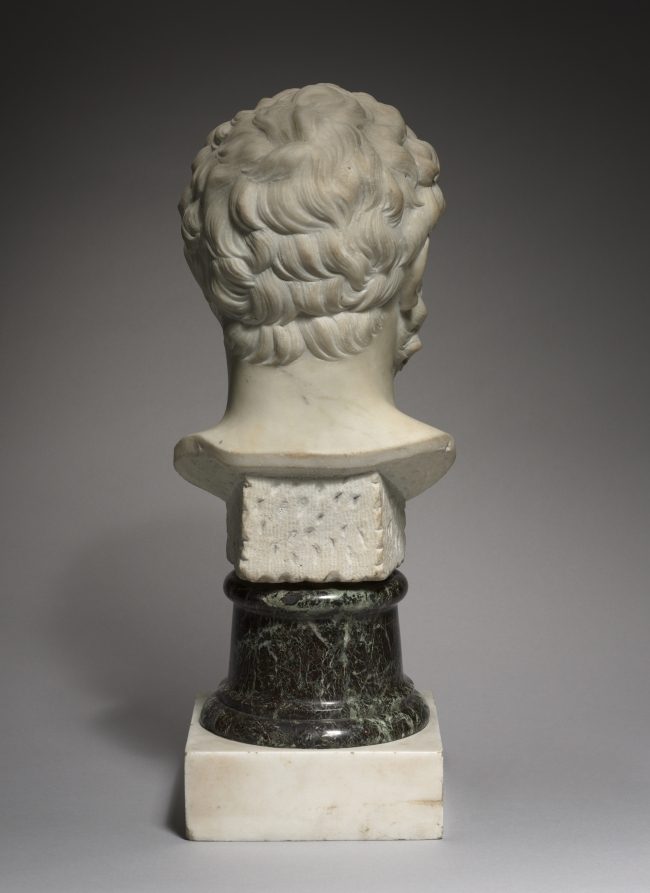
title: A Philosopher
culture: France, made in Rome, 17th century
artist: Pierre Puget (French, 1620–1694)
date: 1662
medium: marble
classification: Sculpture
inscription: inscribed: "P. Puget S. Romae / 1662."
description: Puget traveled to Rome in the early 1660s, where he closely studied ancient busts in the collections of wealthy nobles. Although inspired by Greek and Roman depictions of individual philosophers, orators, and writers, Puget created a generalized image of this type—a mature, bearded man with a furrowed brow— rather than a portrait of a particular historical figure. The rounded forms of the flesh and individual locks of hair are particularly characteristic of 17th-century baroque taste.